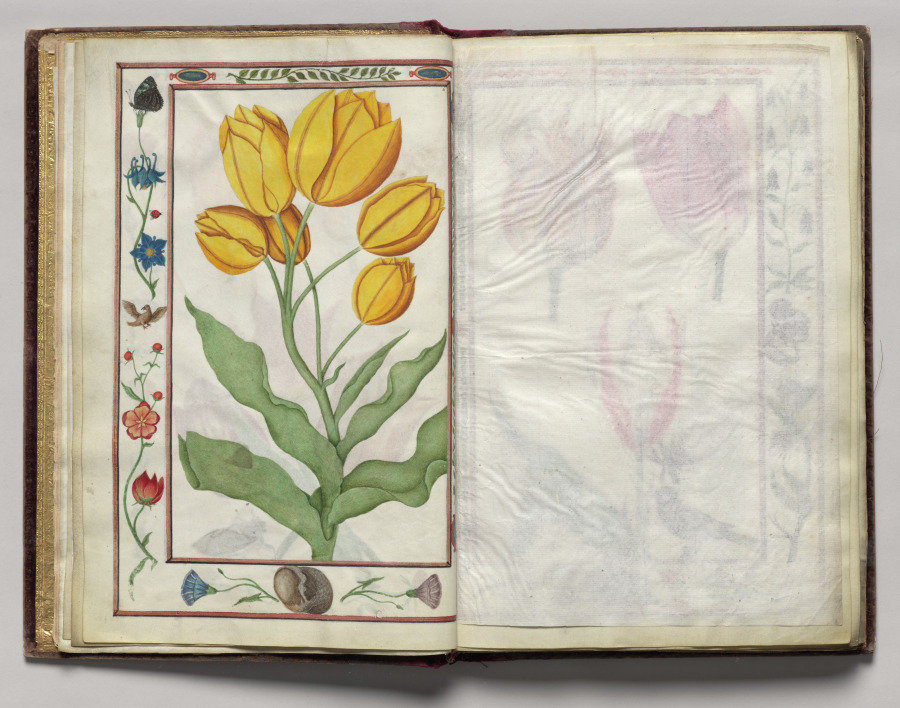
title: Yellow Tulips with Blue Columbine, Glory, Bird, and Butterfly Border, folio 3 (verso), from Florilegium (A Book of Flower Studies)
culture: France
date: 1608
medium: watercolor, ink, silver, and gold over occasional traces of pencil, on vellum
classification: Bound Volume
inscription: Dated: Poitiers 1608 (on frontispiece) Signed: On frontispiece in black ink, lower right: Van Kuyk Notation on drawing: Frontispiece: in pencil, lower margin: * élève de Van Kessel, peintre flammand (* in pencil also appears in front of Van Kuyk's name).